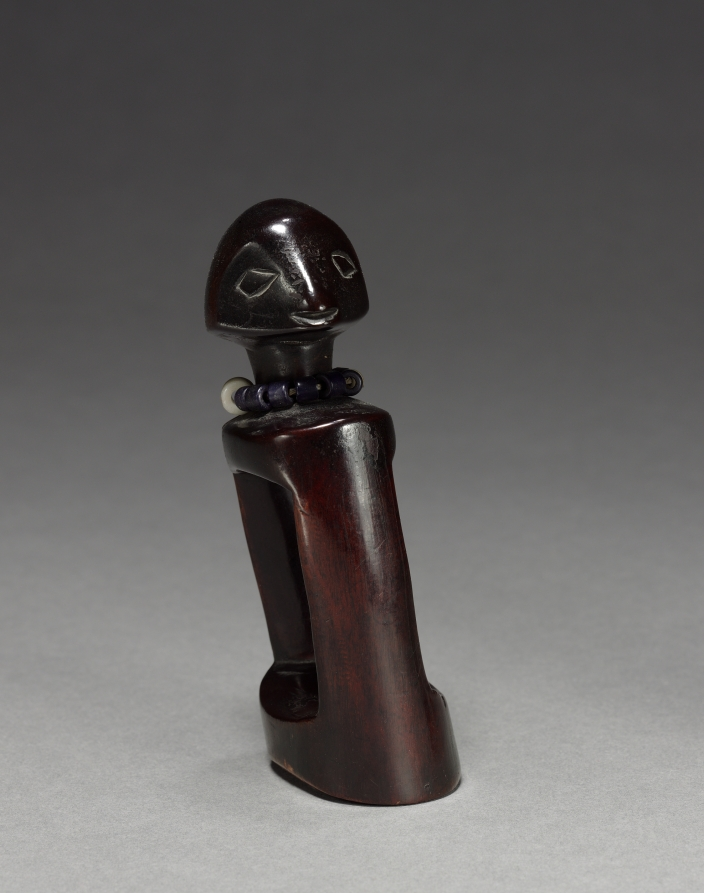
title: Divination Implement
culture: Africa, Central Africa, Democratic Republic of Congo, Luba-style maker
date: late 1800s–early 1900s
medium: Wood, glass beads, and natural fiber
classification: Sculpture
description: This device helped contact an ancestral spirit who clarified misfortunes. The diviner awakened the ancestor by anointing the rectangular frame of the figurine with pungent basil leaves. Sitting on a textured woven mat, the diviner held one side of the instrument while the client held the other. The diviner then posed questions to the ancestor who responded through certain movement signaling affirmation.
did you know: This divination implement is a kakishi (embodiment of an ancestor) device that connects the diviner and the client to the spirit they wish to contact.